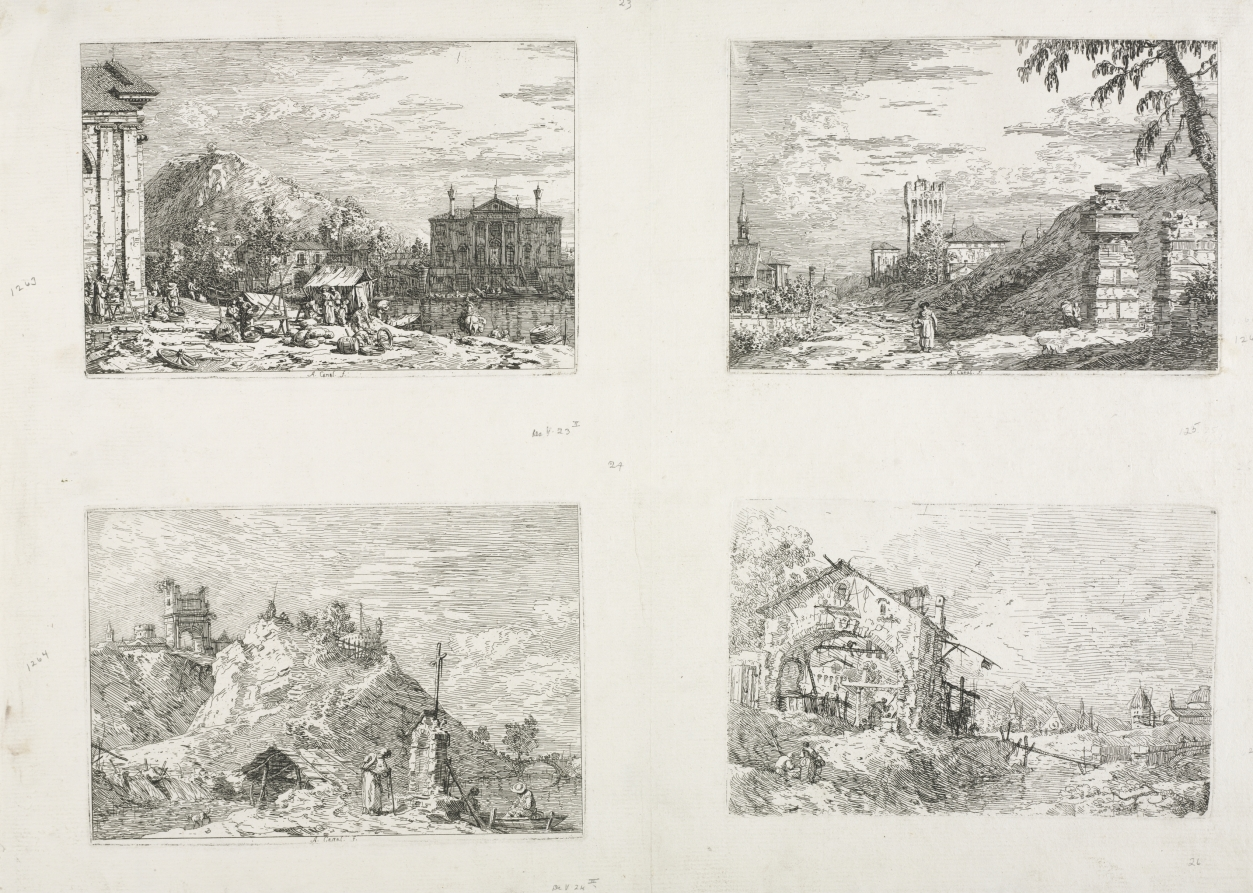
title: Views: A City Beyond a River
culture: Italy, Venice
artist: Antonio Canaletto (Italian, 1697–1768)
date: 1735–1746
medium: etching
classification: Print